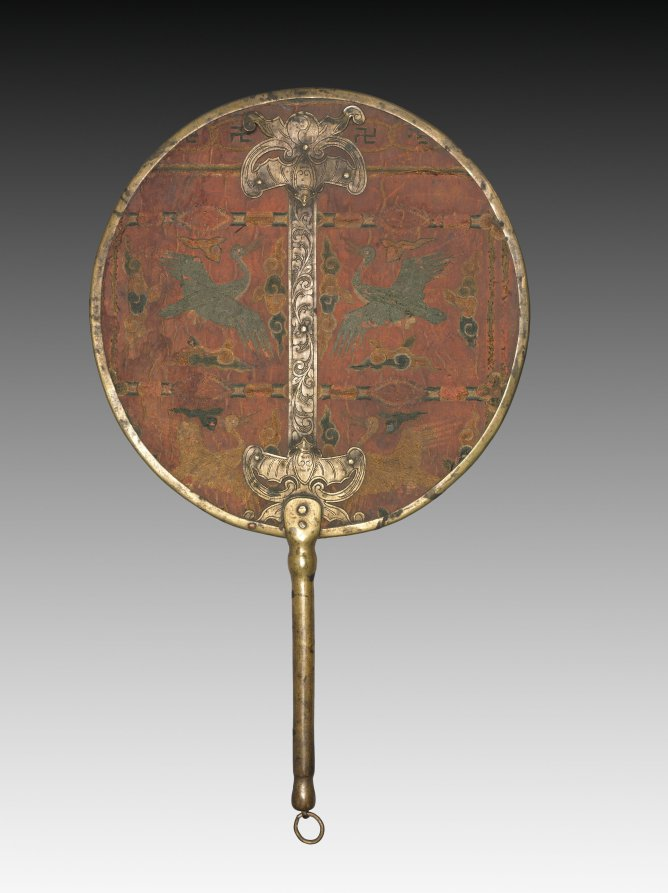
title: Wedding Fan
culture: Korea, Joseon dynasty (1392–1910)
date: mid-1800s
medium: Copper alloy; satin weave silk; silk and metal thread embroidery; and paper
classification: Miscellaneous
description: In the Joseon period, women between the ages of 14 and 20 were matched with a husband through an arranged marriage. Even during the marriage ceremony, a bride was supposed to veil her face with this type of embroidered fan as a gesture of chastity. The fan’s body is made of paper and silk trimmed with a gilded metal rim. On the front, four cranes—one pair in blue, the other in yellow—are stitched along with auspicious clouds. The back is adorned with dragons flying amid clouds. The metal band vertically running down the center is incised with a bat, a symbol of wealth.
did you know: This fan was not to cool oneself, but rather to veil a bride's face during a wedding ceremony as a gesture of chastity.